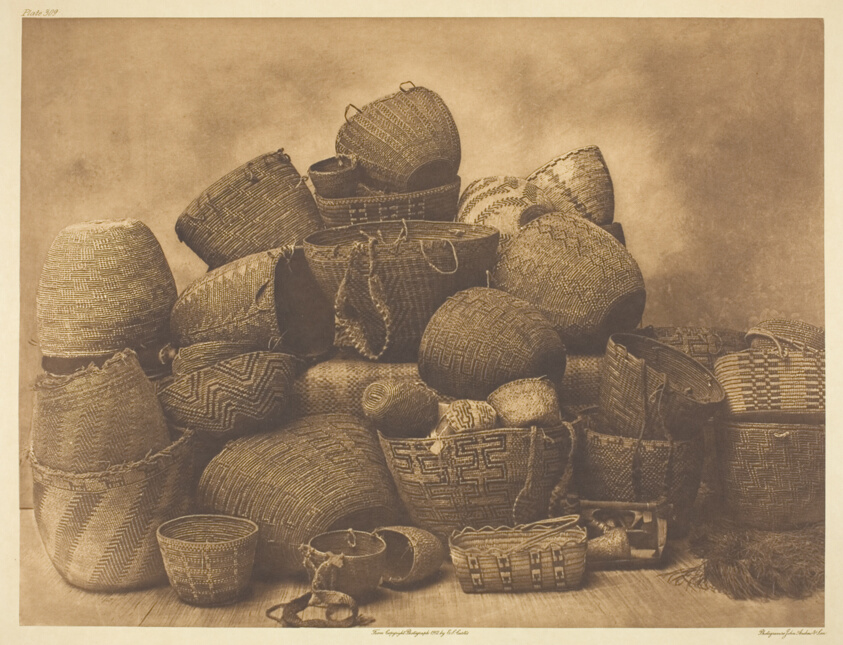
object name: Photograph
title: Puget Sound Baskets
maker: Edward S. Curtis (American, 1868–1952)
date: 1912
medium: Photogravure, plate 309 from "The North American Indian, Volume 9" (1913)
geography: United States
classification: photogravure; photomechanical process; photography; photograph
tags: still life, photography, baskets, basketry